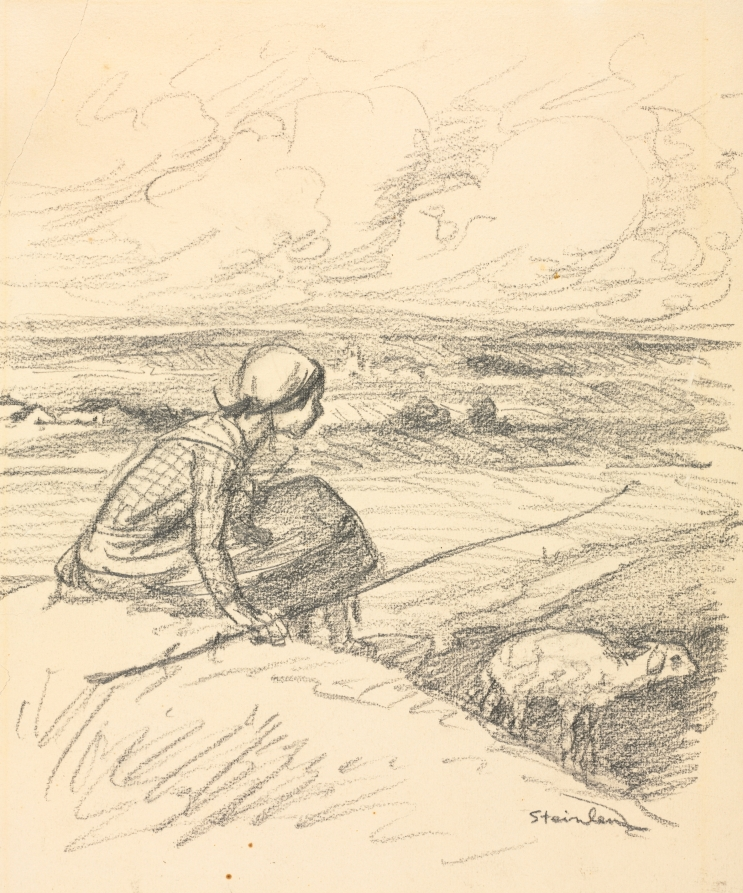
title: The Shepherdess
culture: Switzerland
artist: Théophile Alexandre Steinlen (Swiss, 1859–1923)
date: fourth quarter 19th century or first quarter 20th century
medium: graphite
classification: Drawing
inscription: signed, lower right, in graphite: Steinlen ; VERSO, lower right, in graphite: [posse?]